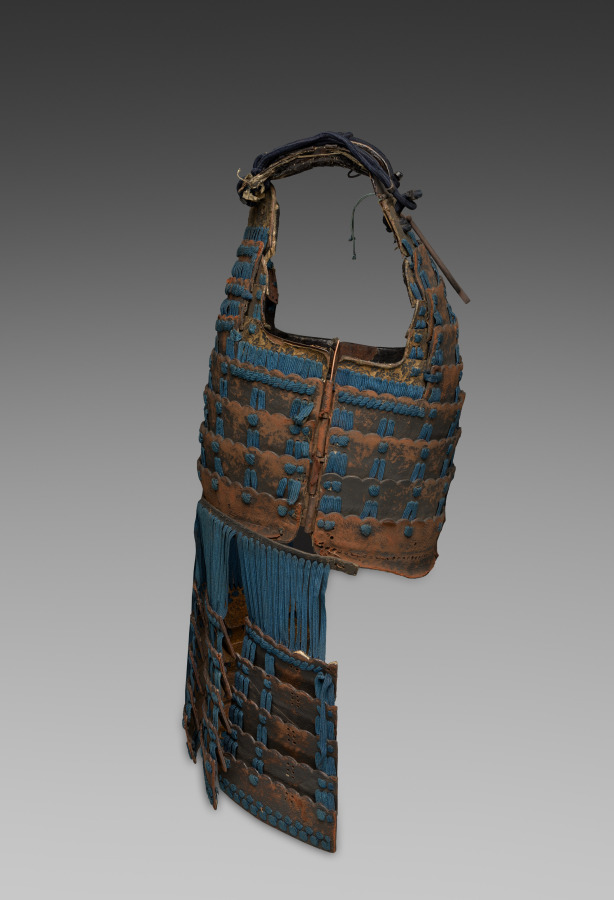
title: Cuirass (Dō)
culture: Japan, Edo period (1615–1868)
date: 1615–1868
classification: Arms and Armor